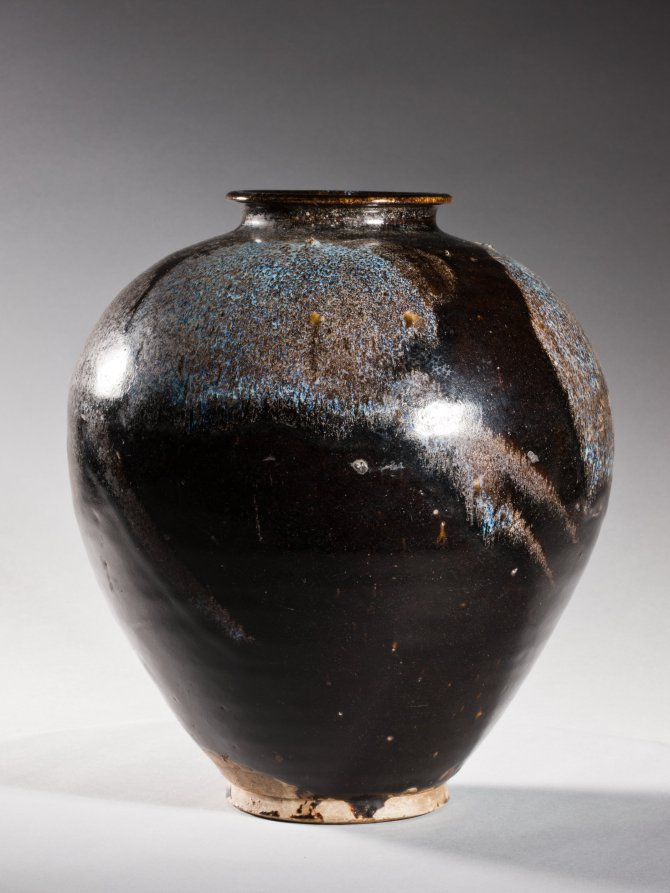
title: Jar: Black Ware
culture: China, Henan province, Huangdao kilns, Tang dynasty (618-907)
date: 700s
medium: glazed stoneware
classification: Ceramic